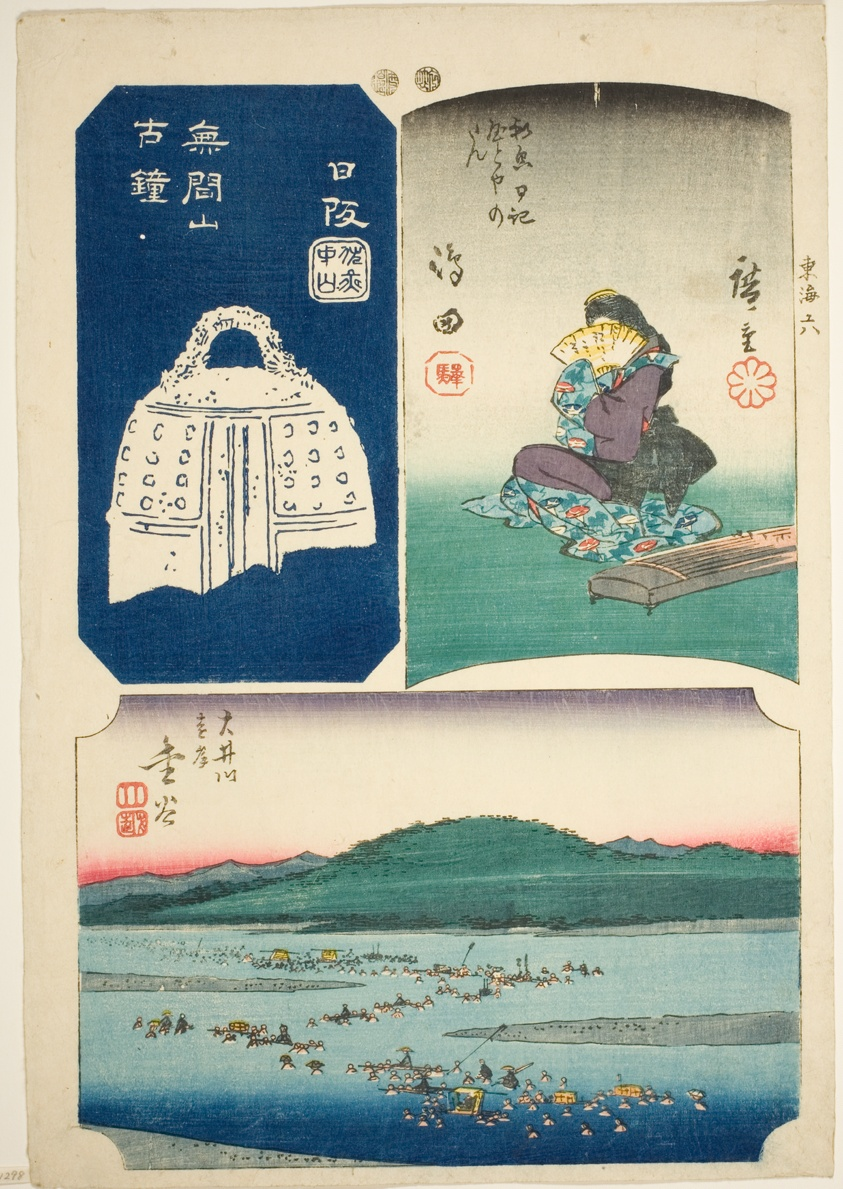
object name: Print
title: Shimada, Kanaya, and Nissaka, no. 6 from the series "Cutout Pictures of the Tokaido (Tokaido harimaze zue)"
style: Japanese (culture or style)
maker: Utagawa Hiroshige 歌川 広重; Japanese, 1797-1858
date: c. 1848/52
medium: Color woodblock print; oban, harimaze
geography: Japan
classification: woodblock print; print; asian art